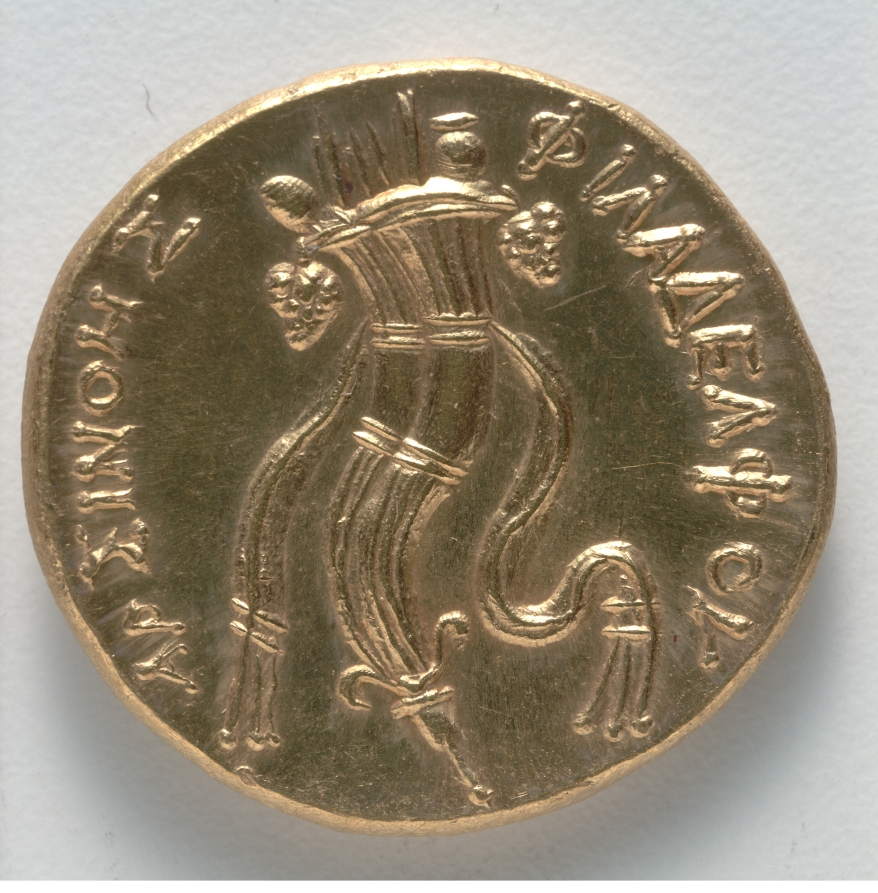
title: Octodrachm: Double Cornucopia (reverse)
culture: Greek, Ptolemaic, minted at Alexandreia (Egypt), reign of Ptolemy V Epiphanes or Ptolemy VI Philometor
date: 205–145 BCE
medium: gold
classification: Coins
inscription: ΑΡΣΙΝΟΗΣ | ΦΙΛΑΔΕΛΦΟΥ